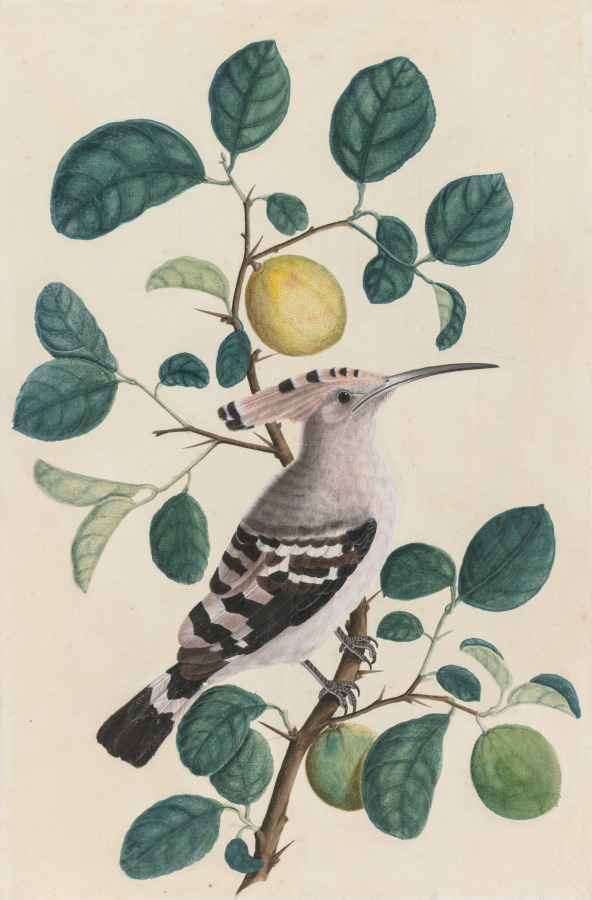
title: Hoopoe on a Citrus Tree Branch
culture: India, Company school, Calcutta, early 19th Century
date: c. 1800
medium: color on paper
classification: Painting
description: Indian artists of the late 1700s and early 1800s painted images of native birds, plants, and animals for British collectors who mainly lived in the fortified enclave of Calcutta (now Kolkata), which then functioned as the center of British power in India. During this period, known as the Age of Enlightenment, natural history subjects were a fashion in art throughout the colonial British world, in response to the pervasive interest in scientific discovery. This small crested bird is named after the sound of its call, “hoopoe,” an onomatopoeia. The dense, regular, and controlled brushwork that lends realistic texture to the plumage and claws reveals the artist’s training in Indian court traditions.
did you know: This small crested bird is named after the sound of its call, “hoopoe,” an onomatopoeia.